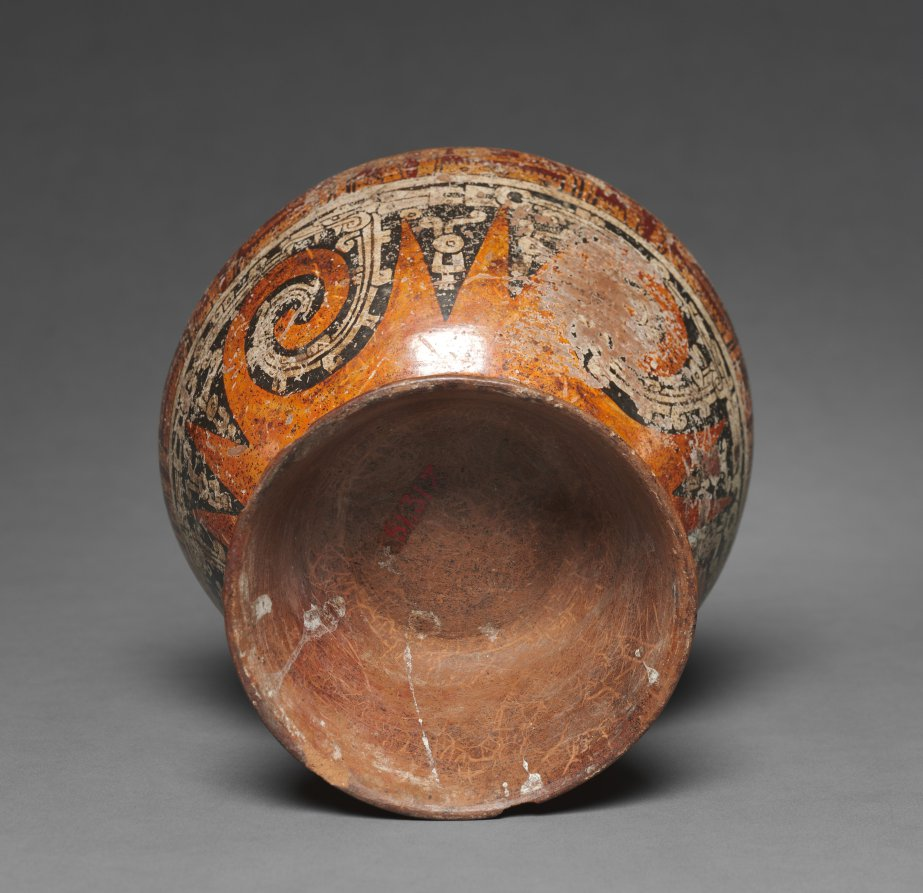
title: Pedestal Bowl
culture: Mexico, Cholula?, Mixteca-Puebla Style, 10th-16th century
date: c. 900–1519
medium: earthenware with colored slips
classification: Ceramic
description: The nobility may have used these goblets for a chocolate beverage or for pulque, made from the fermented sap of the maguey cactus. Both are painted with the precision and brilliant colors for which the Mixteca-Puebla style is renowned, and they carry some of the same motifs, such as the band of stylized animal heads at the top. The smaller bowl has a rattle base.